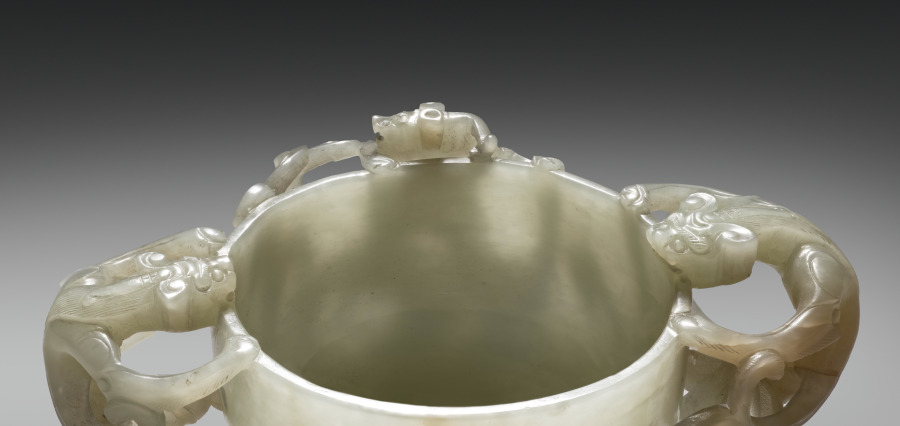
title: Cup with Dragon Handles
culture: China, Qing dynasty (1644-1911), Kangxi reign (1662-1722)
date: 1662–1722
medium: Pale gray-green white jade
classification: Jade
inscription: 萬壽長春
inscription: 壽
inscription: 子剛造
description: Three dragons, auspicious symbols for good fortune, grasp the rim of this bowl. A large shou (longevity) character is visible on the outside wall. Drinking cups with dragon handles were elite luxuries. The yellowish-white color and refined techniques are characteristic of Suzhou workshops that served the court, scholar-officials, and the merchant class. The optimistic attribution to Lu Zigang (late 1500s), a jade master recorded to have been active in Suzhou, suggests that its maker used the master’s name to attract wealthy clients eager to demonstrate their refined taste and connoisseurship.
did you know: Auspicious inscriptions on the base and front of the jade cup convey wishes for longevity.